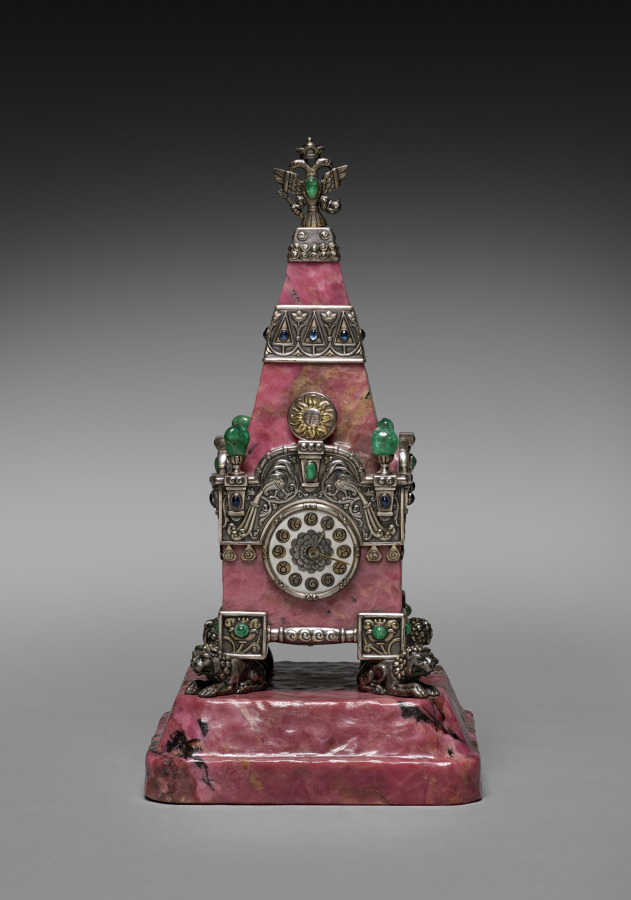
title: Kremlin Tower Clock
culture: Russia, St. Petersburg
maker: House of Fabergé (Russian, 1842–1918)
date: c. 1913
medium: rhodonite, silver, enamel, emeralds, sapphires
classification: Timepiece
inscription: 84, Kokoshnik, delta [assay mark for Moscow, 1908-26]; 91, Kokoshnik; 91; Kokoshnik; C. Fabergé (in Cyrillic); double-headed eagle [imperial warrant]; 16419 k? scratched.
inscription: Painted on clock face: Le Gruet (in script); strike, silence, set hand work (in English).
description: The use of Russian hardstones in creating precious objects became a hallmark of design from the House of Fabergé. Easily carved, these minerals were sourced largely from the western region surrounding the Ural Mountains. Fabergé's workmasters used colorful stones such as agate, nephrite (jade), lapis lazuli, rock crystal, and rhodonite, seen here in this elaborate table or mantel clock, to create all manner of luxurious accessories. Bright pink rhodonite was among the rarest, and consequently most expensive, specimens used by the House of Fabergé. This clock resembles the Taynitskaya Tower, the middle tower on the south side of the Kremlin. The House of Fabergé created this work to commemorate the 300th anniversary of the Romanov dynasty, representing Fabergé's ability to balance the functionality of objects with intricate decorative design.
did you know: The Kremlin tower, which this clock resembles, has a secret well and an underground tunnel that leads to the Moscow River.